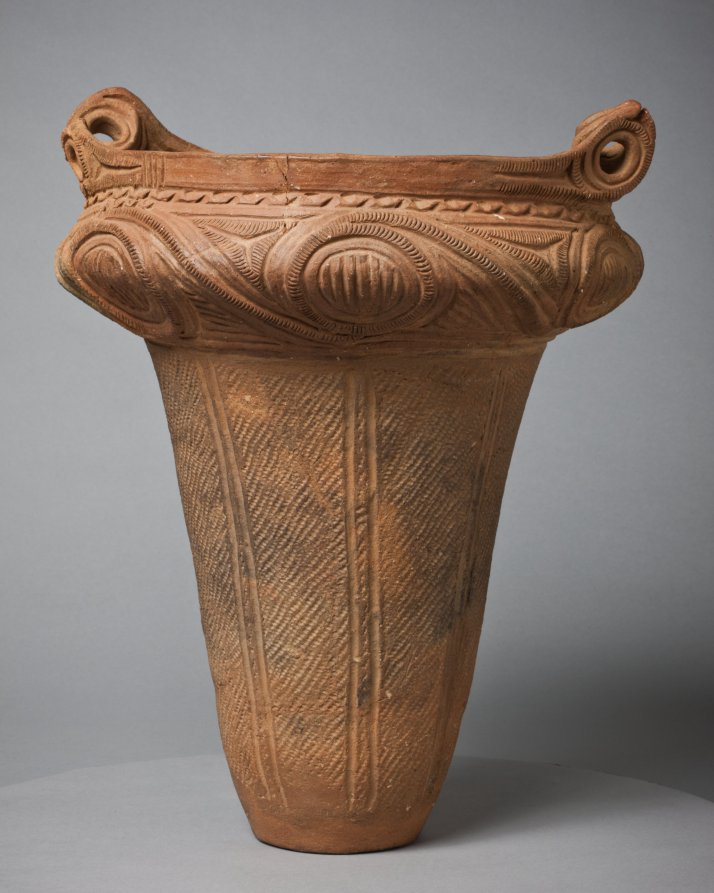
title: Urn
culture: Japan, Jōmon period (c. 10,500–300 BCE)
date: c. 2000 BCE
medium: earthenware, terracotta, impressed and incised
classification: Ceramic